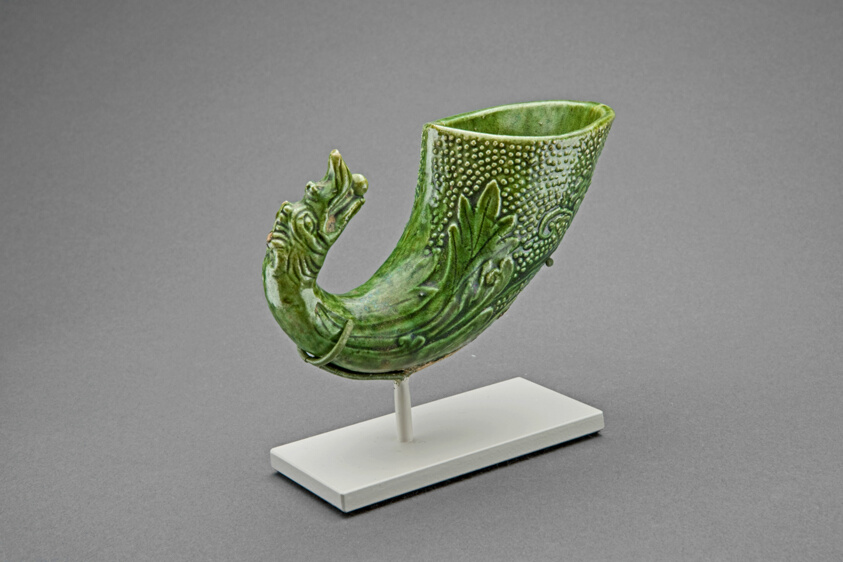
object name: Vessel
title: Dragon-Head Rhyton Cup with Stylized Leaves and Dots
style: Chinese (culture or style)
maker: China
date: Tang dynasty (618–907), late 7th or early 8th century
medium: Earthenware with molded decoration and green lead glaze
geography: China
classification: decorative arts